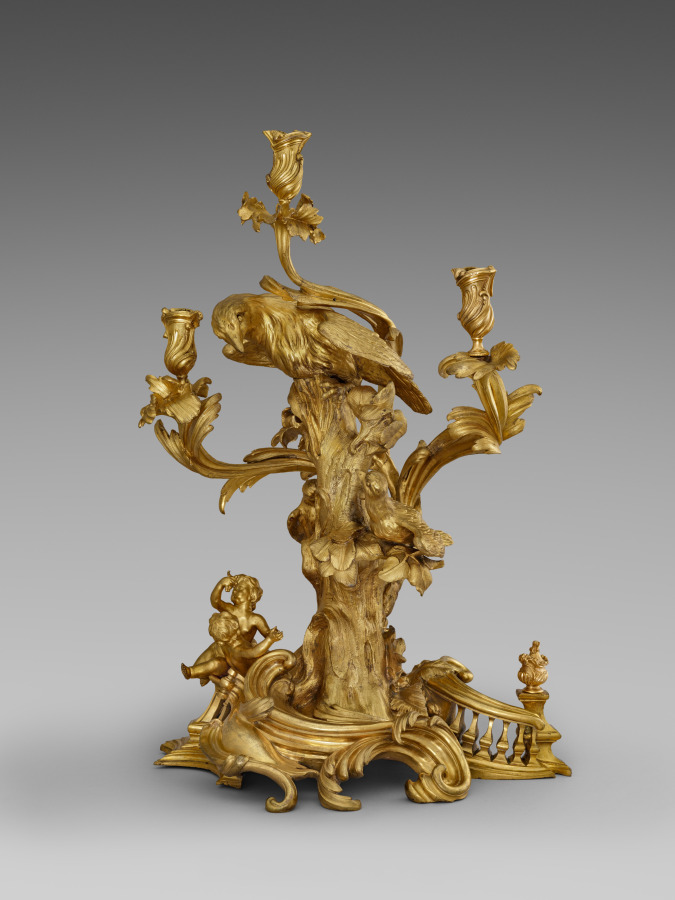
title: Candelabrum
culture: France, 18th century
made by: probably by Jean Joseph de Saint-Germain (French, 1720–1791)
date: c. 1750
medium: gilt bronze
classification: Furniture and woodwork